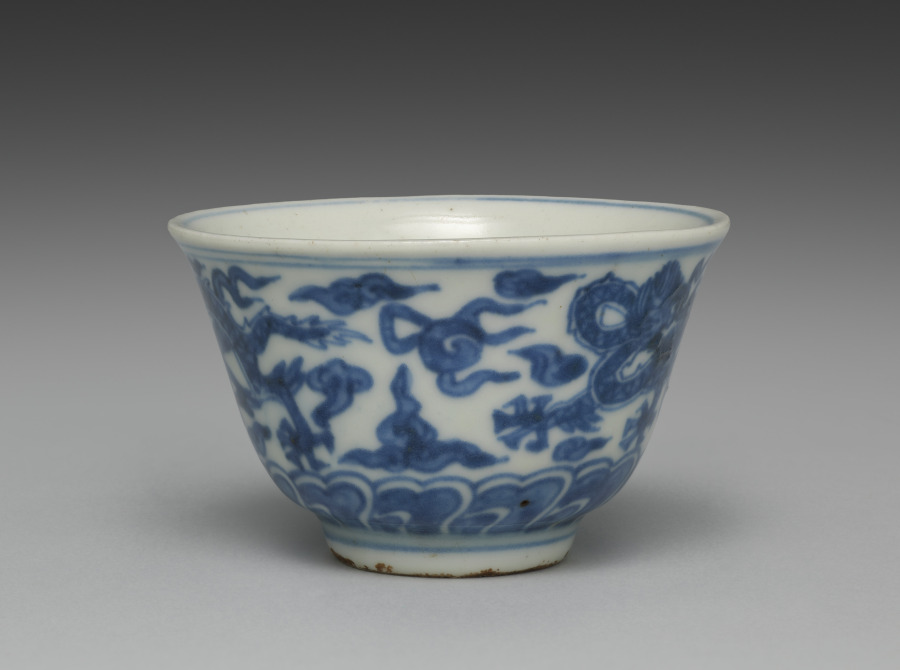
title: Cup from Tea Cups with Dragons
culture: Japan, Edo period (1615–1868)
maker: Seifū Yohei I (Japanese, 1801–1861)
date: 1840s–57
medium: One from a set of five tea cups; porcelain with underglaze blue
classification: Ceramic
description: Seifū Yohei I made both blue and white porcelains after Ming dynasty (1368–1644) Chinese wares fired in the kilns at Jingdezhen for export. He also made colorful stoneware in the style of his teacher, Nin’ami Dōhachi (Takahashi Dōhachi II) (1783–1855).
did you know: A small figure of an elephant serves as the handle for the lid.